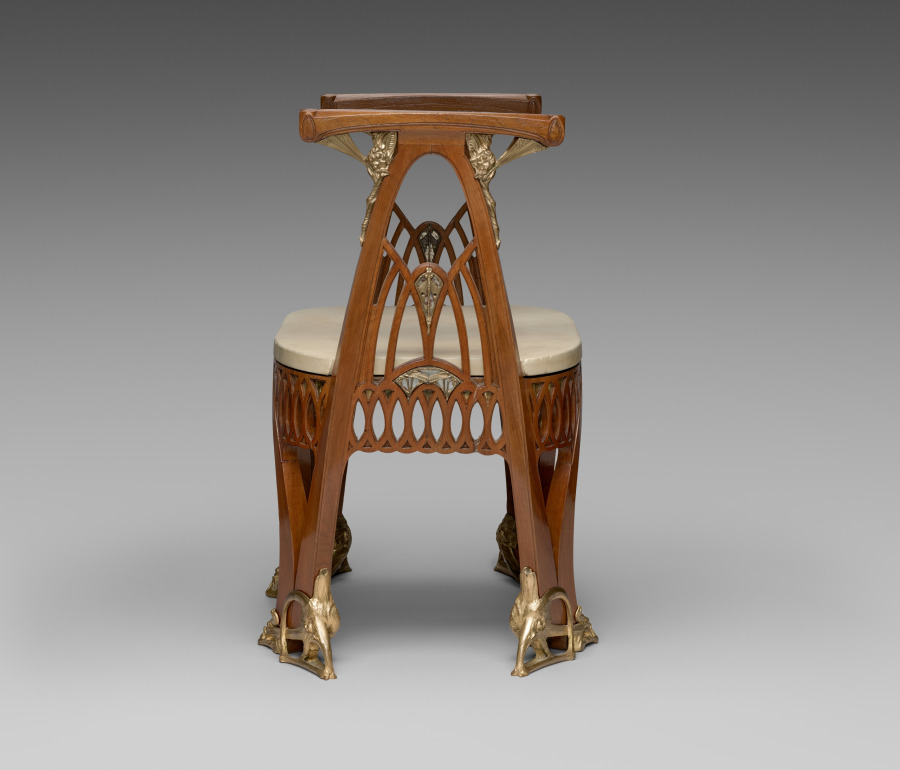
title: Tabouret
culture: France, Paris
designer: Carlo Bugatti (Italian, 1856–1940)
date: c. 1907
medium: Mahogany, parchment, gilt bronze, mother-of-pearl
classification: Furniture and woodwork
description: Although this tabouret is undocumented, its design, with its interlaced ovoid forms, gilt cast metal mounts, and mother-of-pearl inlays, is so close in style to the Cleveland Museum of Art’s celebrated tea table (1991.45) that it too can be assigned to Bugatti's Parisian period and dated about 1907.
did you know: Carlo Bugatti's son Ettore founded the luxurious car company Bugatti Automobiles.